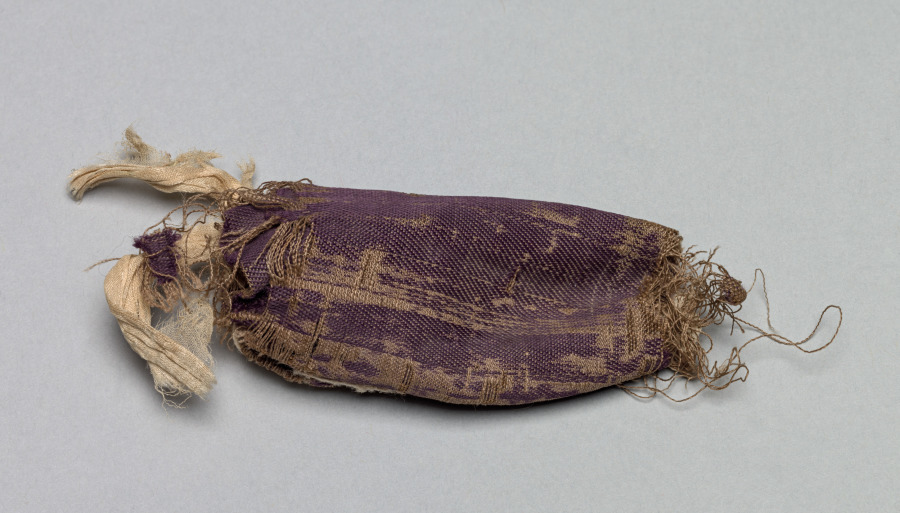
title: Relic of St. Hermetis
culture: Germany, Lower Saxony?, Romanesque period, 11th century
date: c. 1045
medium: bone, compound weave or samite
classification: Metalwork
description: This relic is in the portable altar commissioned by Countess Gertrude of Brunswick, one of the Guelph Treasure’s earliest and most sumptuous objects.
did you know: This relic is a long bone from an arm or a leg (such as a humerus, femur, or fibula); exact identification is not possible without unwrapping.